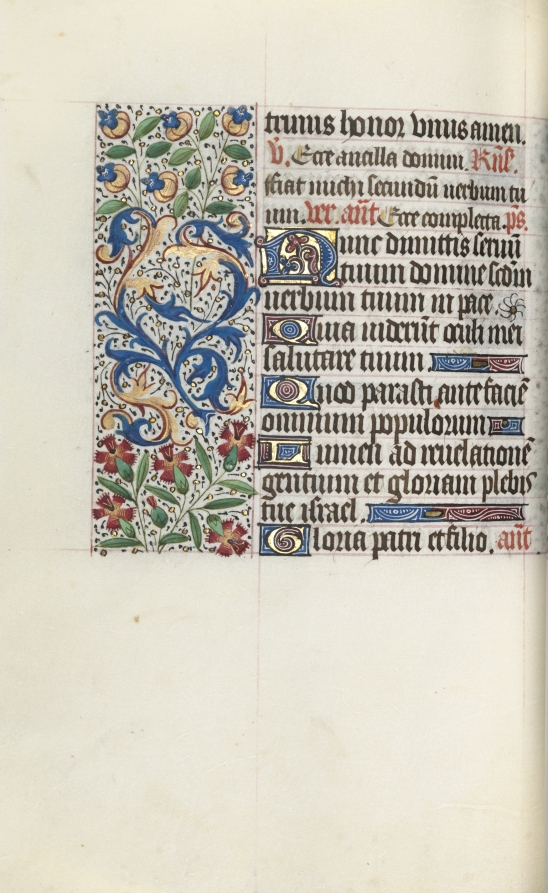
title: Book of Hours (Use of Rouen): fol. 78v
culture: France, Rouen, 15th century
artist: Master of the Geneva Latini (French, active Rouen, 1460–80)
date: c. 1470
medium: ink, tempera, and gold on vellum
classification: Bound Volume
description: In the late 1400s and early 1500s Rouen was an established and important center of book production. The city’s cathedral had a wealthy chapter that spent large sums of money to commission books and to maintain its extensive library. The stationers and booksellers would have likely been concentrated in or near the cathedral precinct. This artist, named after a manuscript now in Geneva, was Rouen’s principal illuminator during the second half of the 1400s.